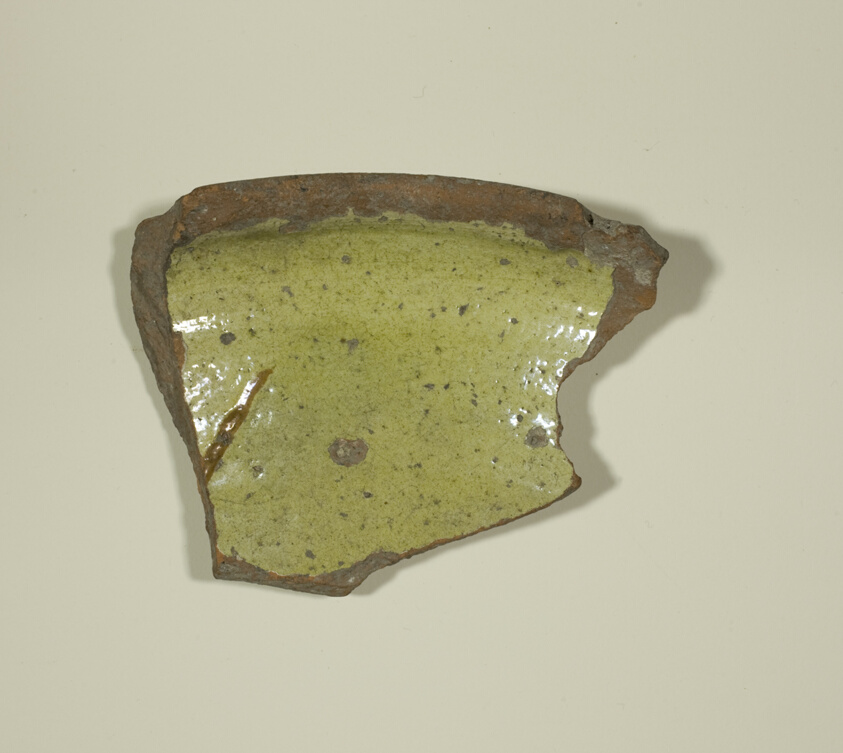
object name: Decorative Arts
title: Fragment of a Plate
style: byzantine, european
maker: Byzantine (Greece, Thessaloniki)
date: 13th-14th century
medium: Ceramic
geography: Istanbul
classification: fragment; ceramics; plate (general, dish); asian art; decorative arts